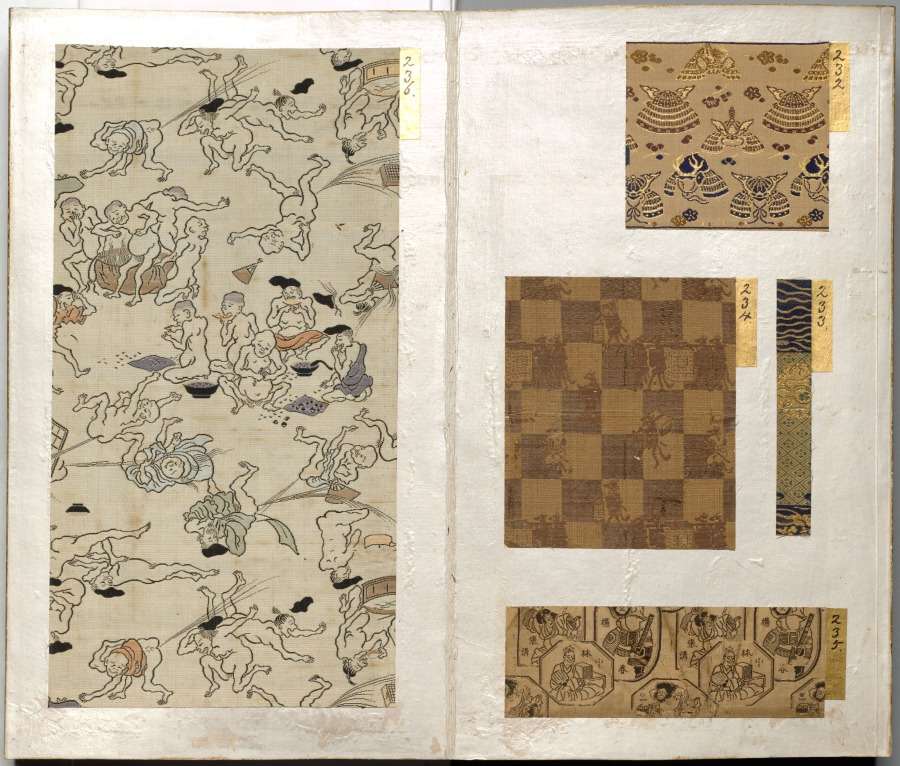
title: Album of Textile Samples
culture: Japan, Edo period (1615–1868)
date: 1600s-1700s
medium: silk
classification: Textile